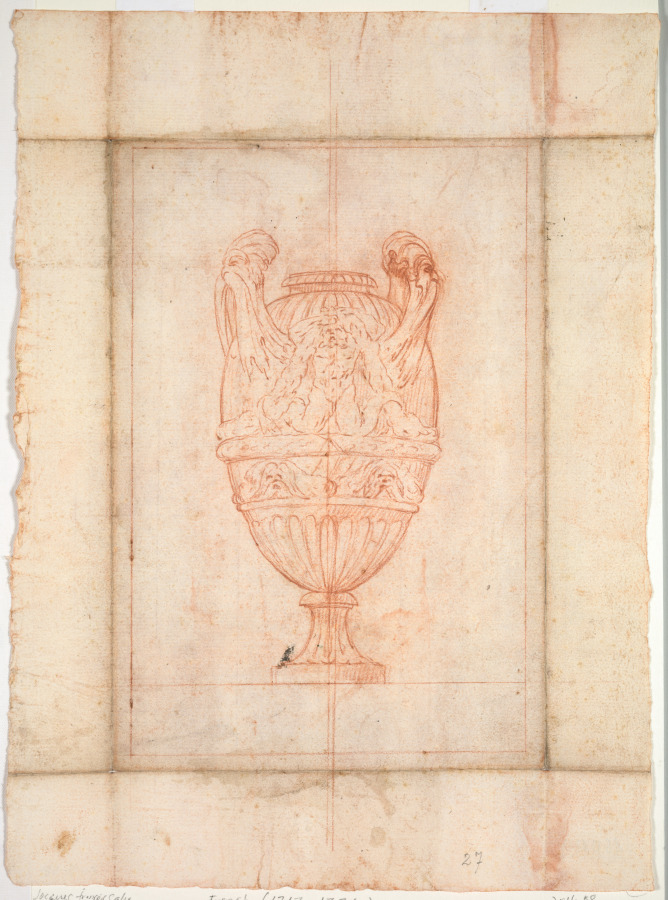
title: Vase Design for 'Suite of Vases': Plate 27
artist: Jacques François Saly (French, 1717–1776)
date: 1746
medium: Red chalk on laid paper, incised for transfer; verso coated with red chalk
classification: Drawing